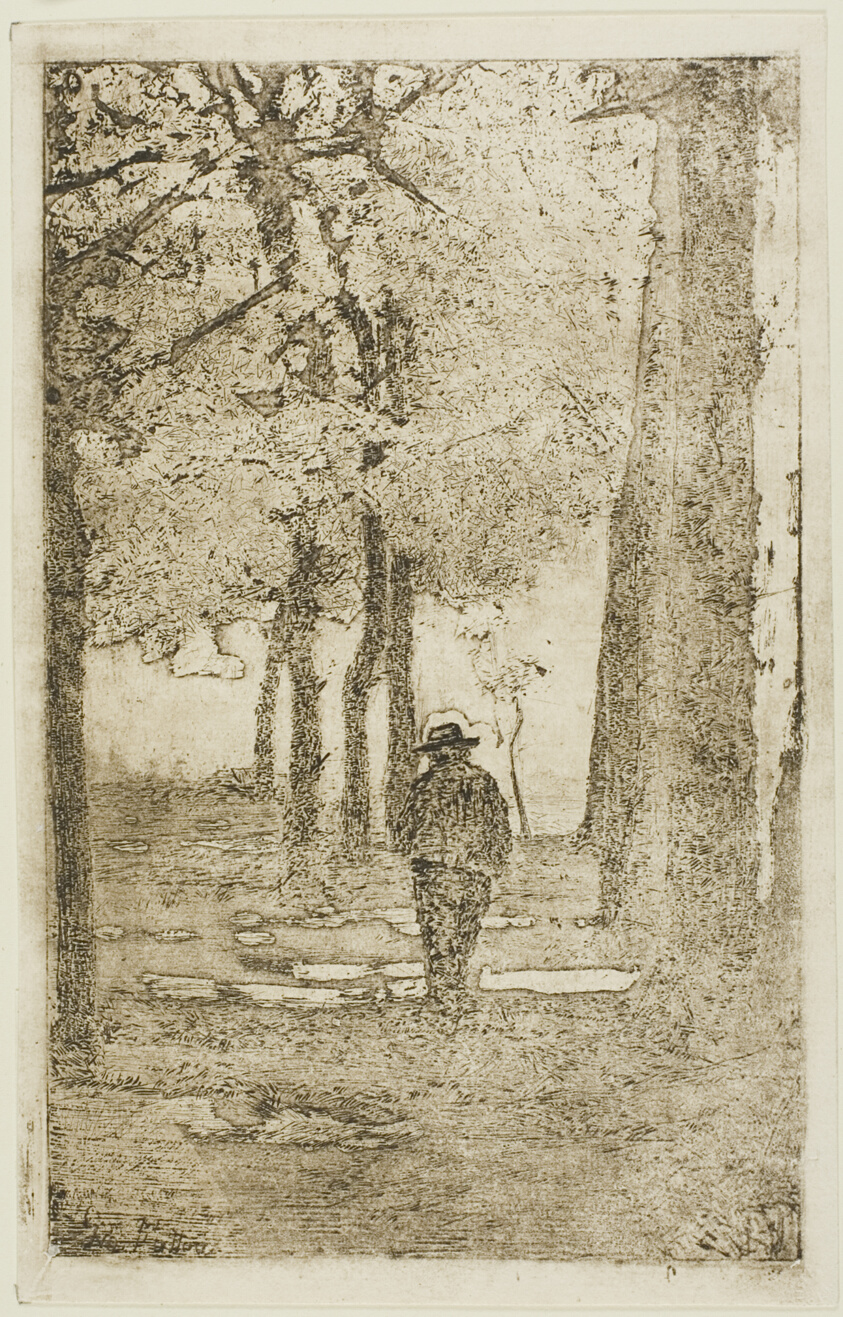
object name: Print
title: Wooded Walk with Figure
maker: Giovanni Fattori (Italian, 1825-1908)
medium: Soft ground etching and aquatint, from a zinc plate, in warm black on cream wove paper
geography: Italy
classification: etching; print; prints and drawing